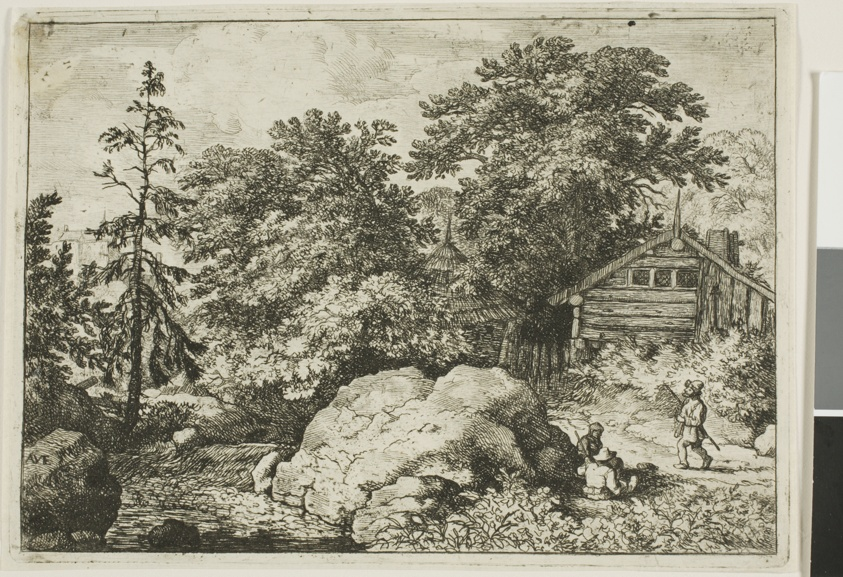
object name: Print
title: The Hill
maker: Allart van Everdingen; Dutch, 1621-1675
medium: Etching and engraving on paper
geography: Holland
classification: etching; print; prints and drawing